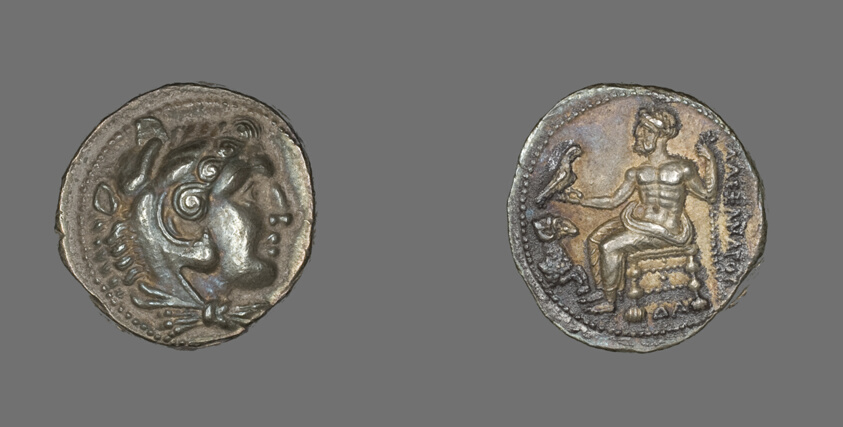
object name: Coin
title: Tetradrachm (Coin) Portraying Alexander the Great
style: greek, ancient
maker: Greek, minted in Damascus, Syria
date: 336-323 BCE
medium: Silver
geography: Ancient Greece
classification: coin; ancient art